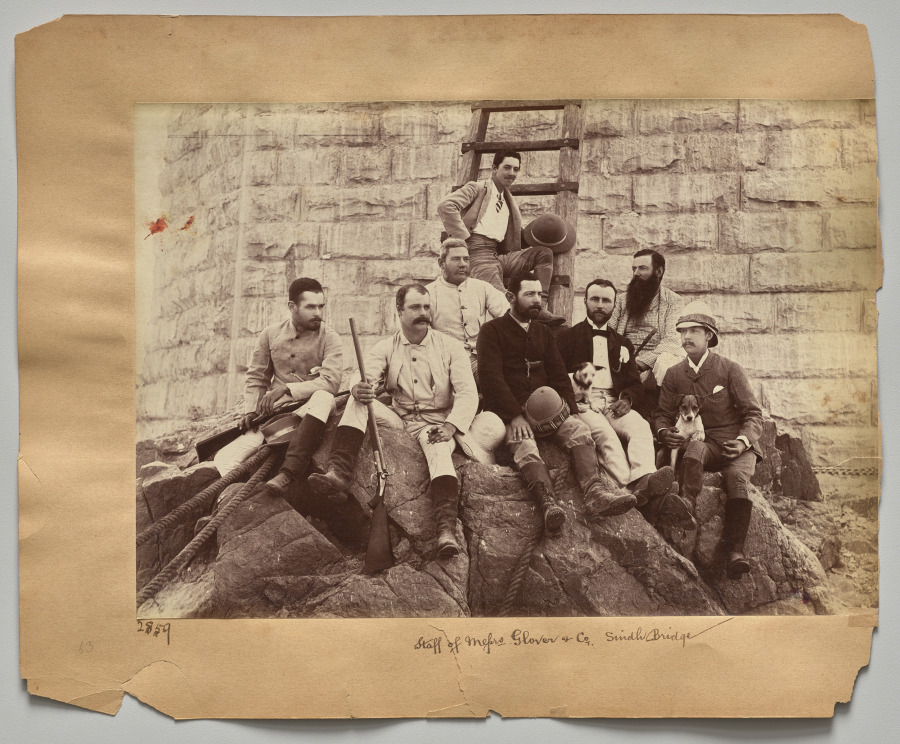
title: Staff of Messrs. Glover & Co., Sindh Bridge (verso)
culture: India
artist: Raja Deen Dayal (Indian, 1844–1905)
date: c. 1882–87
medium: albumen print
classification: Photograph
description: These photographs are part of an album, now disassembled, of around 105 photographs taken in India between 1885 and summer 1887 that provide glimpses into the lives of the British colonial elite and royal and upper-class Indians. The museum holds another group of 37 pictures from this album (2016.266), which was probably commissioned by a British civil servant visiting or working in India around 1888 as a personal souvenir of his experiences there.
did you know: Raja Deen Dayal is regarded now, and was considered during his lifetime, to be India’s most important 19th-century photographer.